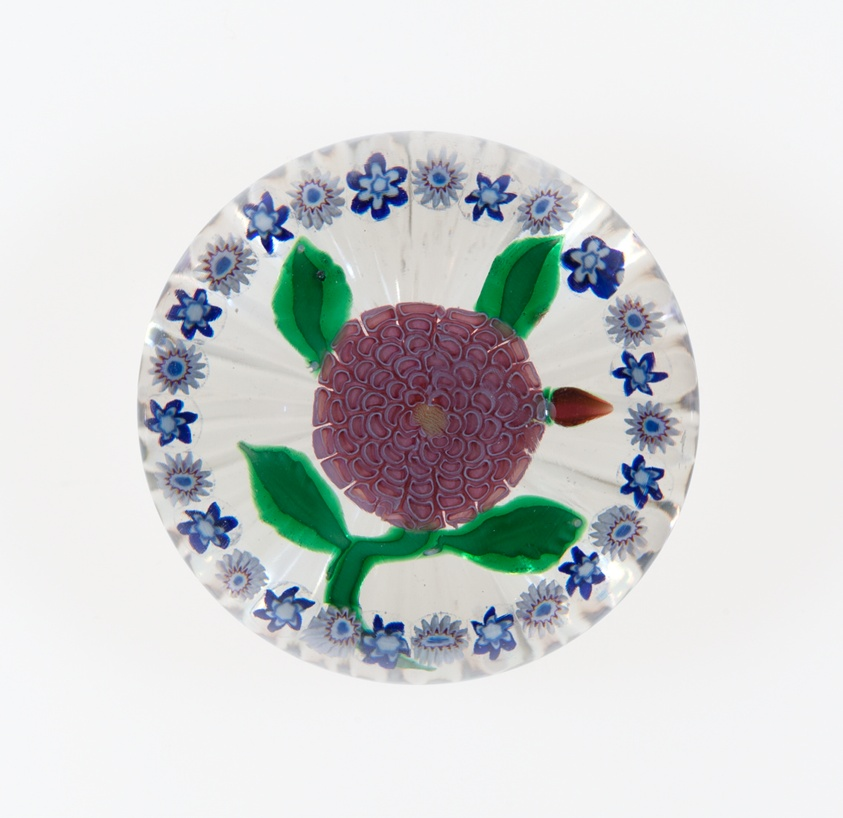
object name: Glass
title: Paperweight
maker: Saint-Louis Glassworks (Cristalleries de Saint-Louis); Lorraine, France, founded 1586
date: c. 1848–55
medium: Glass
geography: Saint-Louis-lès-Bitche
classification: paperweight; glass